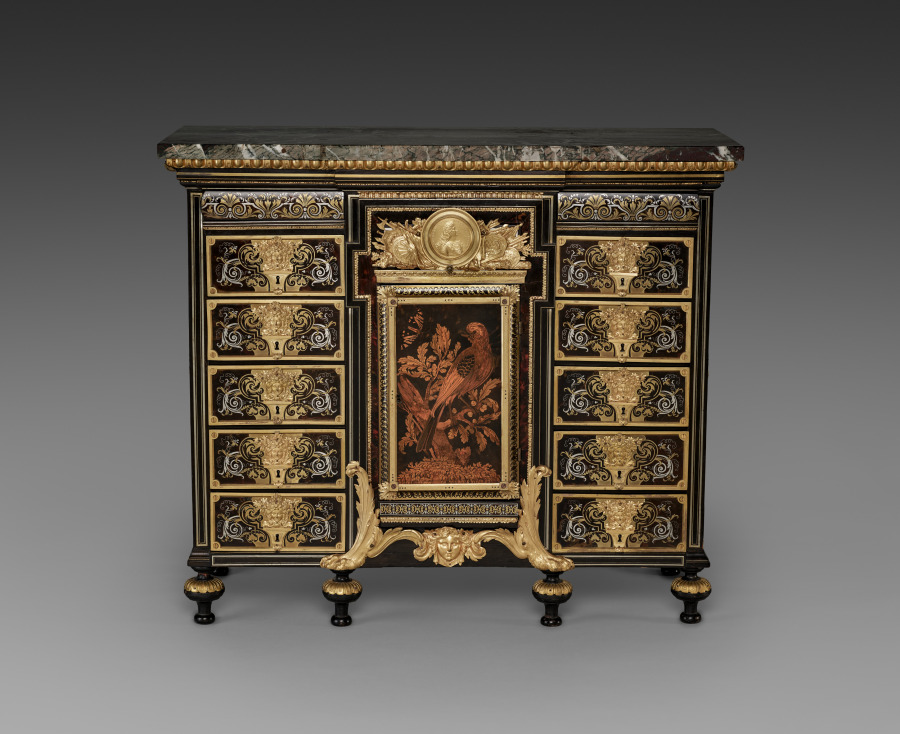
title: Cabinet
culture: France, late 17th Century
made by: André-Charles Boulle (French, 1642–1732)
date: c. 1690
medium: ebony, marquetry in metal and tortoise shell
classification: Furniture and woodwork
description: Appointed cabinetmaker to King Louis XIV in 1672, André-Charles Boulle became a master of furniture making in France during the late 1600s until his death in 1732. Known primarily for his use of marquetry, in which metal patterns are inlaid into tortoiseshell then applied within the veneered surface of the furniture, Boulle established a level of quality and craftsmanship few others could achieve. As a result, his work found favor at the royal court and among other aristocrats and diplomats eager to impress the king. The inclusion of a medallion depicting Louis XIV within the bronze decoration of this chest would have identified the owner with the royal court. Often exhibiting stout architectural proportions with elegant groups of inlaid motifs such as the parrot on the central panel of this chest, Boulle’s designs are an example of the intellectual fashion for contrasting ideas, materials, and motifs.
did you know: Originally designed to sit atop an elaborate tall stand, this chest was likely altered in the late 1700s to reduce its scale and height.